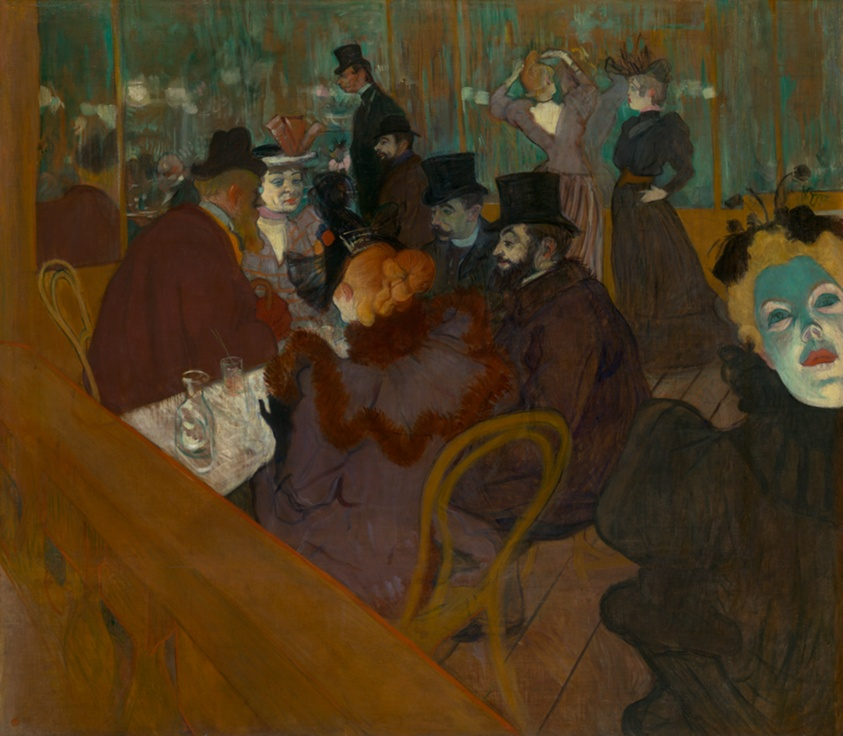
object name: Painting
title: At the Moulin Rouge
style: Post-Impressionism, nineteenth century, 19th century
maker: Henri de Toulouse-Lautrec (French, 1864–1901)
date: 1892/95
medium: Oil on canvas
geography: France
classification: oil on canvas; french; oil paintings (visual works); paint; painting; european painting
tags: nightlife, table, performers, performance, dancers, dance, chairs, bars, interiors, women, men, leisure, night scenes, urban life, Century of Progress, world's fairs, Chicago World's Fairs